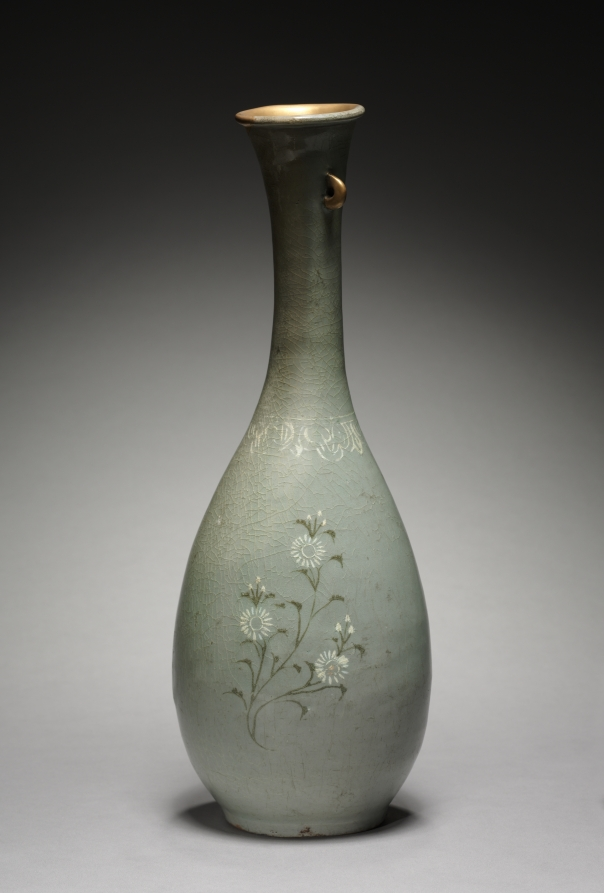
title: Bottle with Chrysanthemum Design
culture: Korea, Goryeo dynasty (918–1392)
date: 1200s-1300s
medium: Celadon ware with inlaid white and black slip decoration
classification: Ceramic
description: This rare long-neck celadon wine bottle is inlaid with white wild chrysanthemums, symbols of both the poem "Drinking Wine" and blessings of longevity. One root has three stems with tiny white blossoms. The damaged lip was repaired with gold lacquer. Korean Celadons Repaired with Gold Termed kintsugi (literally meaning “gold joinery”) in Japanese, this method of repair highlights broken parts with glittering gold mixed with lacquer. Initiated in 15th-century Japan, the technique follows a popular aesthetic concept called wabi-sabi, which finds beauty in imperfect things and continued to be practiced throughout the modern period in East Asia. Goryeo celadons were considered extremely rare treasures among modern collectors; thus, the broken condition of these examples is brilliantly highlighted in gold lacquer on the repaired spouts, handle, and lid.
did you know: Termed kintsugi (literally meaning “gold joinery”) in Japanese, this method of repairing broken parts with glittering gold mixed with lacquer was extensively used for ceramic works in the Goryeo period, such as this one.